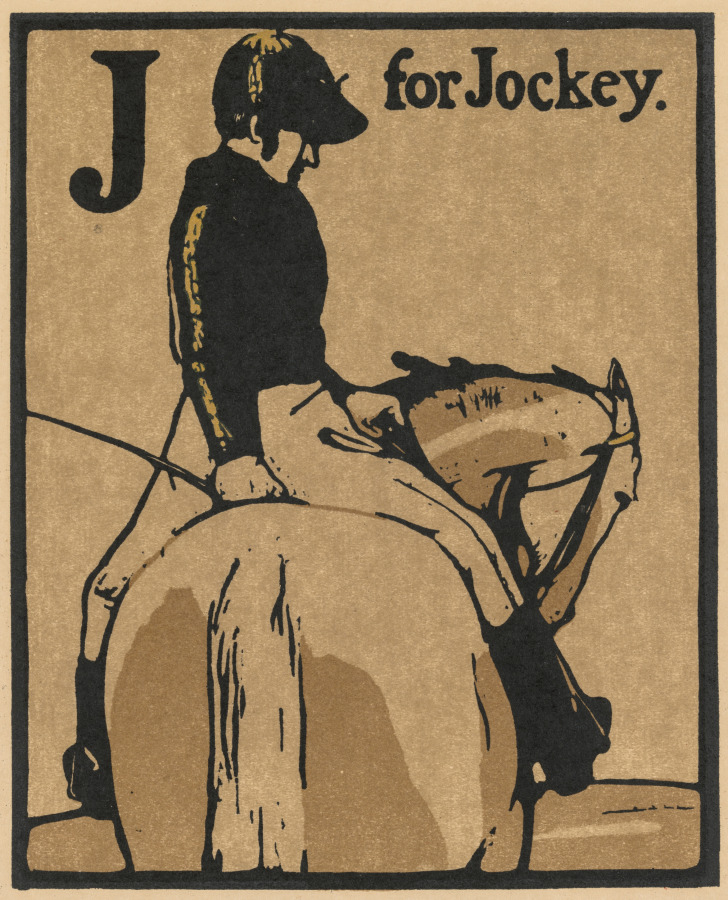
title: An Alphabet: J for Jockey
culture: Britain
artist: William Nicholson (British, 1872–1949)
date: 1838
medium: lithograph on wove paper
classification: Print